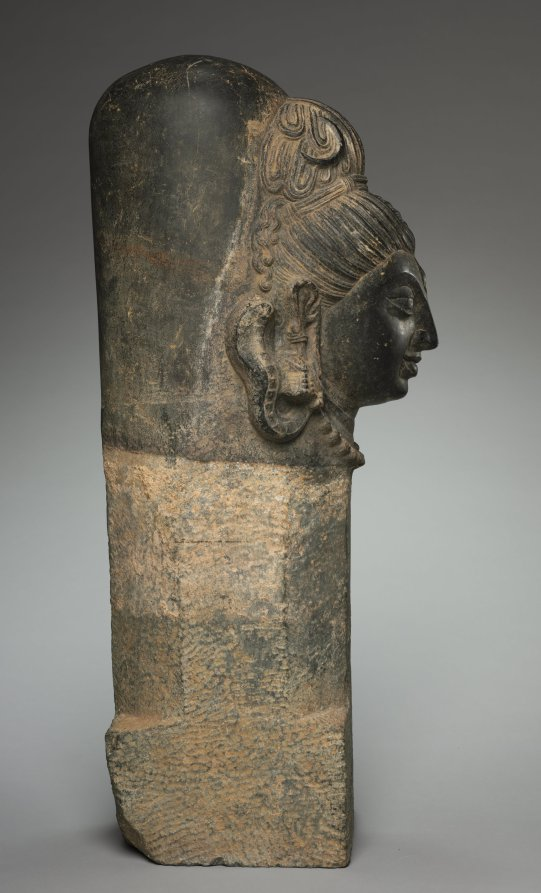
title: One-Faced Linga (Ekamukhalinga)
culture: Eastern India, Bihar, Medieval period, Pala dynasty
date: 600s–700s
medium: chloritic schist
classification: Sculpture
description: The innermost sanctum of a Hindu temple dedicated to Shiva is called a womb chamber in which a stylized phallus called a linga is installed. Together, the chamber and linga represent the potentiality of creation. Artists depict the first stage of creation by a face emerging from the phallus, which embodies one aspect of Shiva. This face is of a powerful yogi, with long matted locks adorned with a crescent moon. He has a penetrating gaze with all three of his eyes. This icon would have been accessed primarily by Brahmin priests who would perform rituals honoring Shiva as the ultimate creator of the world.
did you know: Some lingas have four faces that indicate a more advanced stage of creation.